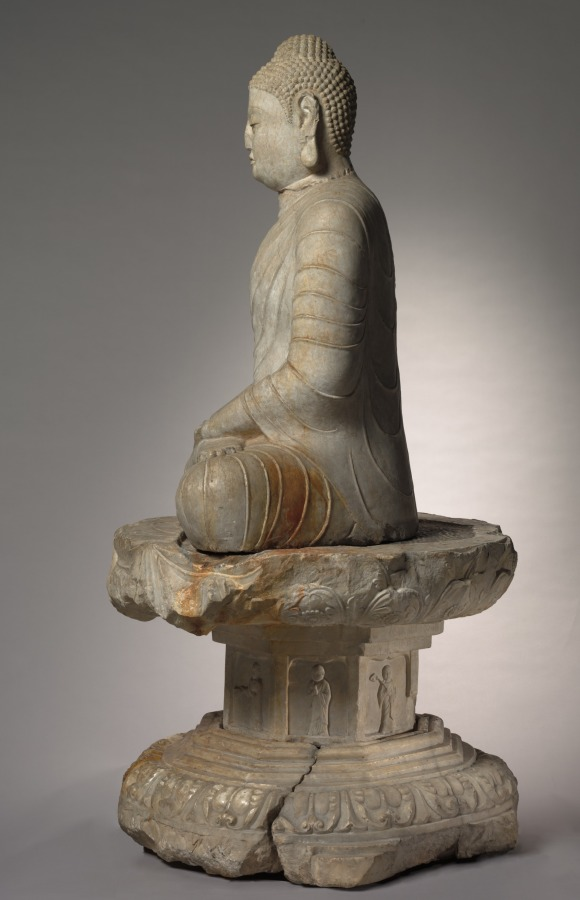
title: Fang Xuanling Pedestal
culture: China, Tang dynasty (618-907)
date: 647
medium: marble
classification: Sculpture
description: This double lotus pedestal exhibits the rich, ornate style of early Tang sculpture. It was commissioned by the Duke of Liang, Fang Xuanling (578–648), for the blessing of his second son and daughter-in-law, the Tang imperial princess of Gaoyang. The iconography and inscription suggest that it originally went with a statue, now missing, of Shakyamuni, the historical Buddha, instead of Amitayus. Today the pedestal is topped with Amitayus, the Buddha of Infinite Life, seated in meditation. Although the pedestal was not made with the statue, the combination is faithful to the original artistic conception.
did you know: In front, the top layer of the pedestal has an abstract curvilinear motif suggesting drapery; the rear is carved with a flower-and-leaf motif.